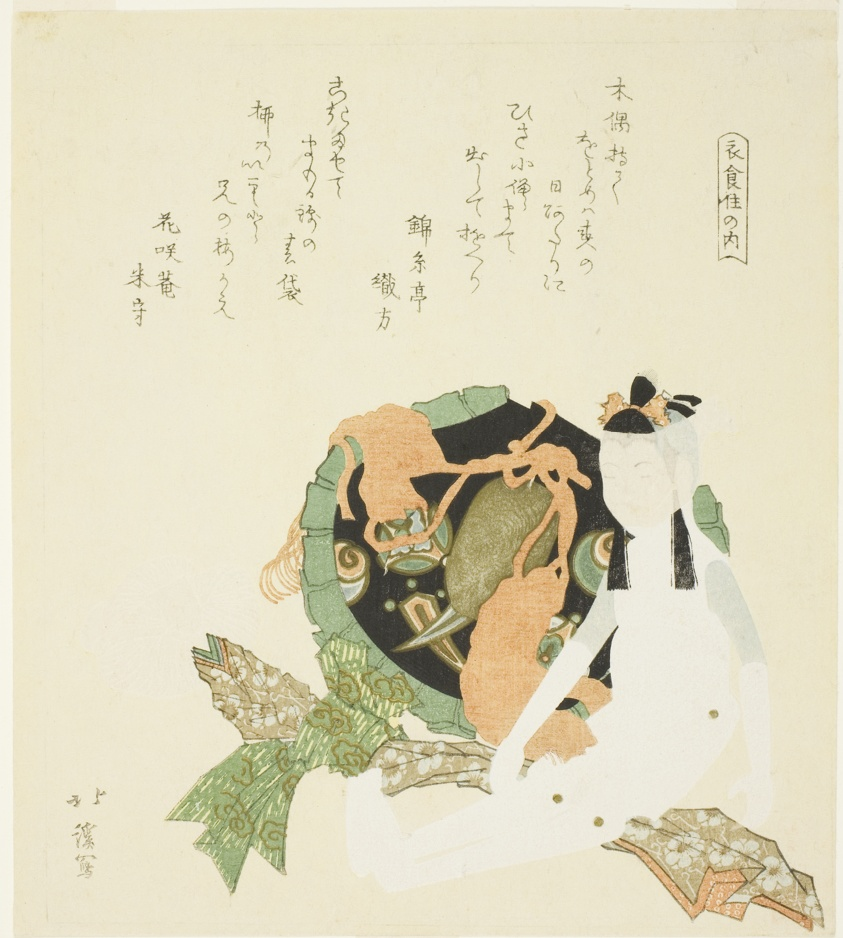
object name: Print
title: Two dolls and a brocade bag, from the series "Clothing, Food, and Shelter (Ishokuju no uchi)"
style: Japanese (culture or style)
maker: Totoya Hokkei (Japanese, 1780-1850)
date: 1818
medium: Color woodblock print; shikishiban, surimono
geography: Japan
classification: woodblock print; print; asian art